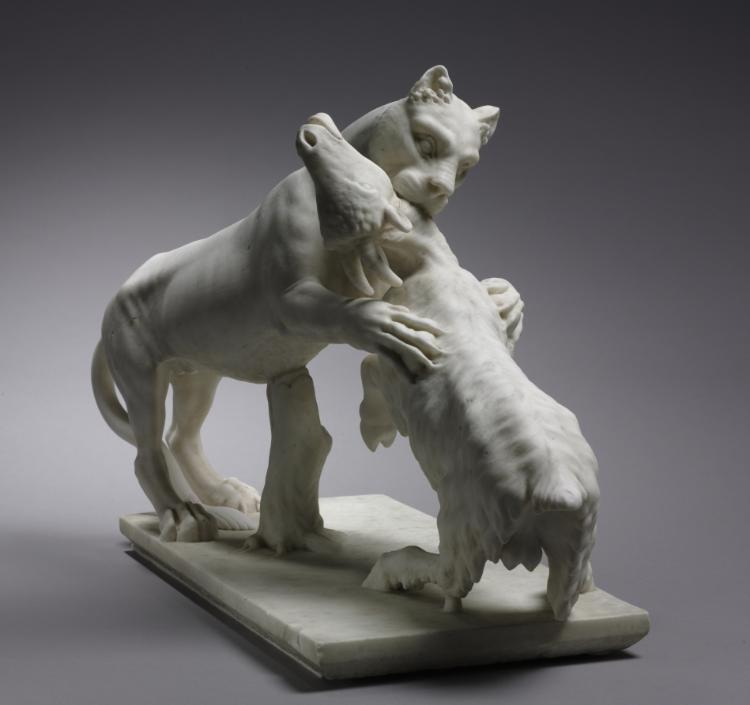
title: Panther Attacking a Goat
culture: Italy, 18th century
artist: Francesco Antonio Franzoni (Italian, 1734–1818)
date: late 1700s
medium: marble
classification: Sculpture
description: One of the best known restorers of ancient sculpture, Francesco Franzoni often invented totally new compositions from small fragments. However, this sculpture is entirely Franzoni’s own work, down to the breaks seen in such places as the panther’s tail and the goat’s legs and jaw. Curiously, Franzoni based this work on one of his own restorations, now in the Vatican, although his composition here is more balanced and elegant, in keeping with ideas in the late 1700s about how ancient sculpture should look.